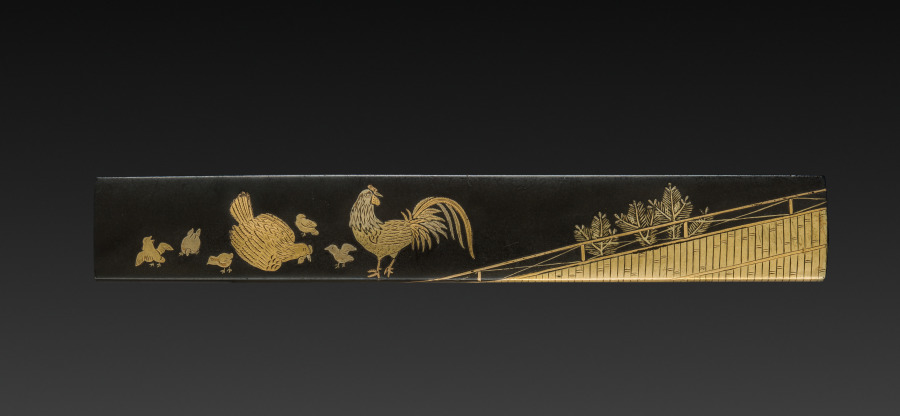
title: Knife Handle (Kozuka) with Family of Chickens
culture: Japan, possibly Edo period (1615-1868)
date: c. 1615–1868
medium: Copper-gold alloy (shakudō), gold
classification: Metalwork